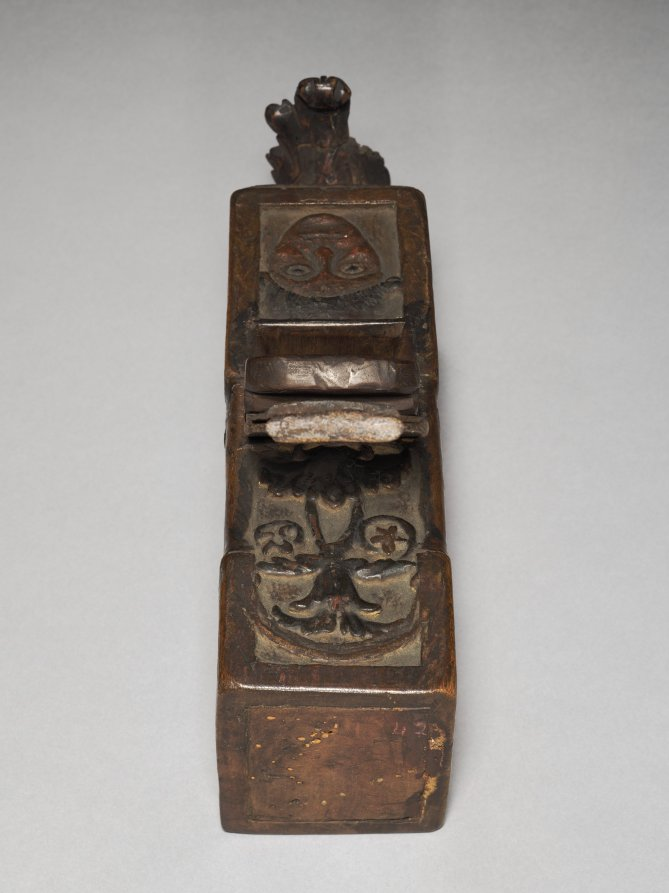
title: Carpenter's Plane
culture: Italy, late 16th century ?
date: late 1500s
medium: wood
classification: Tool